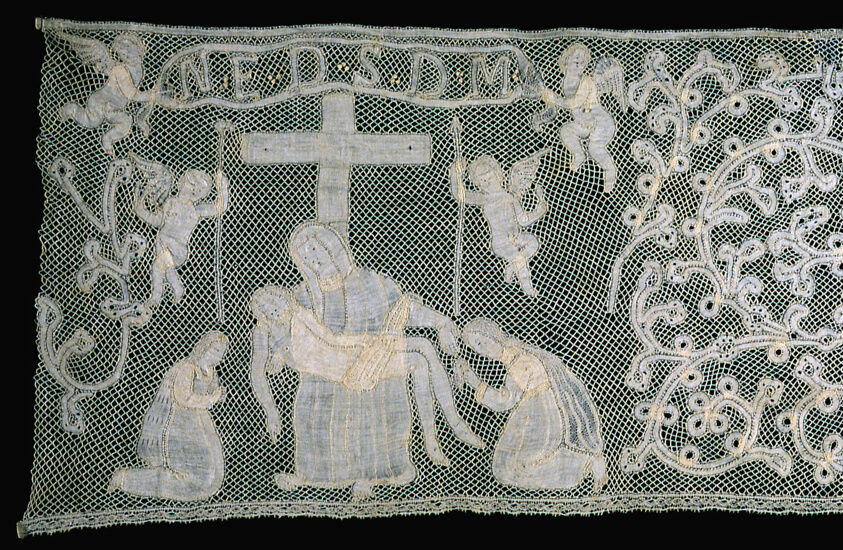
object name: Textile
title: Border (From an Altar Cloth)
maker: Italy, Milan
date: 1725/75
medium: Linen, bobbin part lace; embellished with glass beads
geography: Milan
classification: textile; lace - bobbin